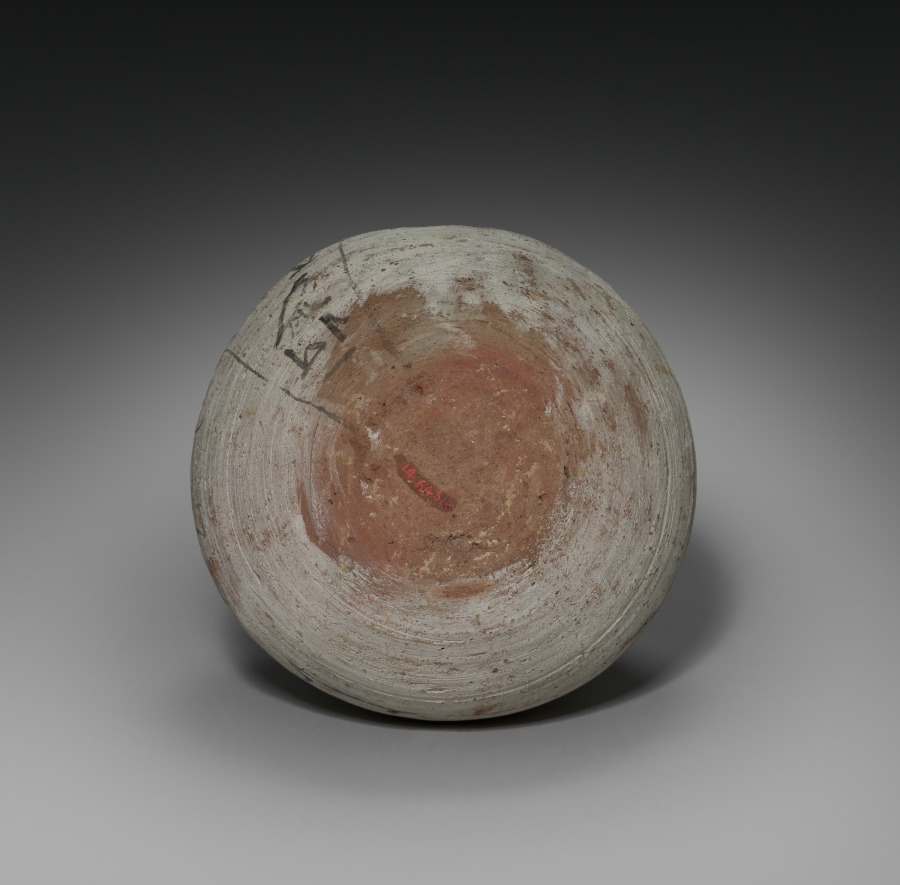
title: Shawabty Jar with Lid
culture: Egypt, New Kingdom (1540–1069 BCE), Dynasties 19–20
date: 1295–1069 BCE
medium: Nile silt ware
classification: Funerary Equipment